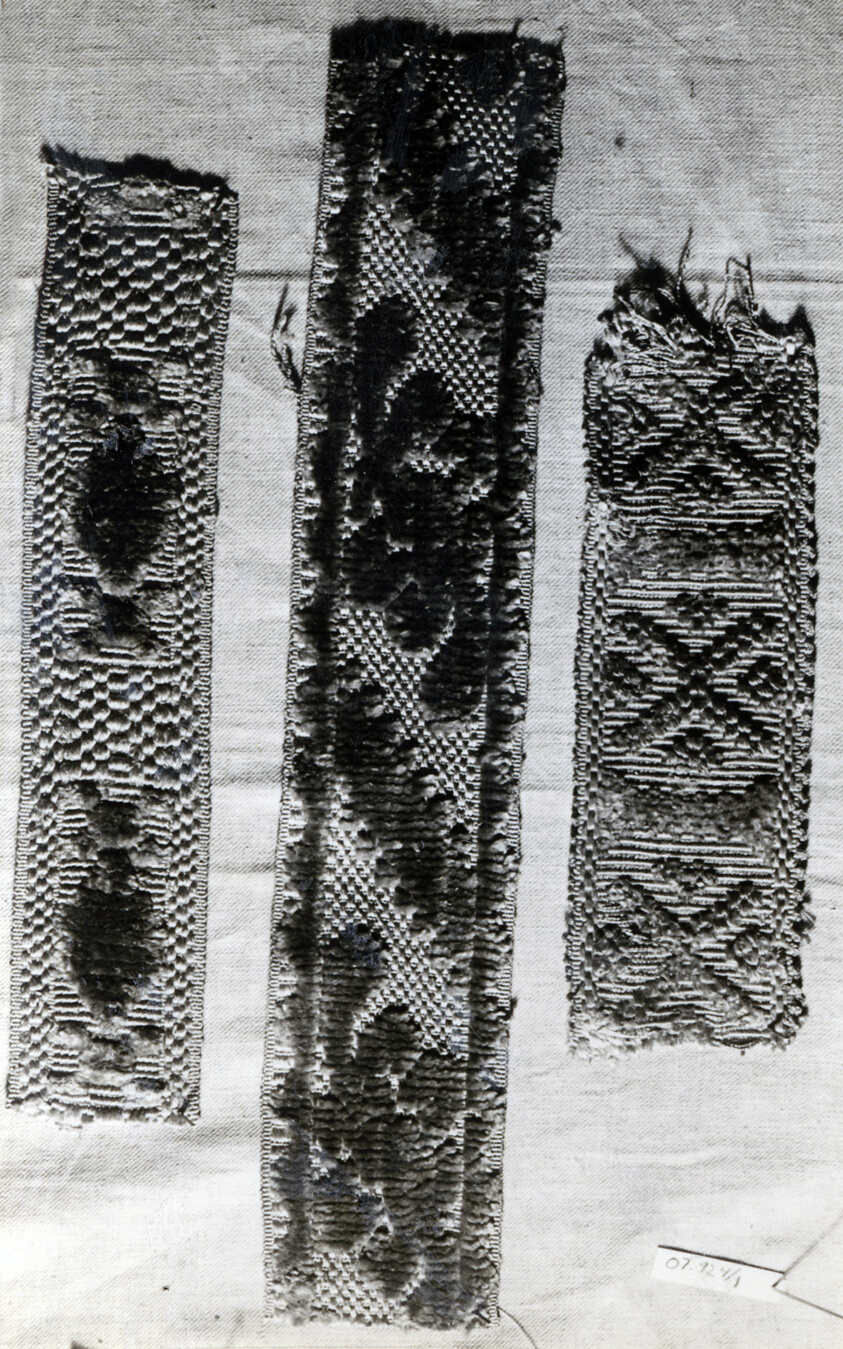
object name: Textile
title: Three Galloons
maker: Italy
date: 18th century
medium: velvet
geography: Italy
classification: textile; weaving